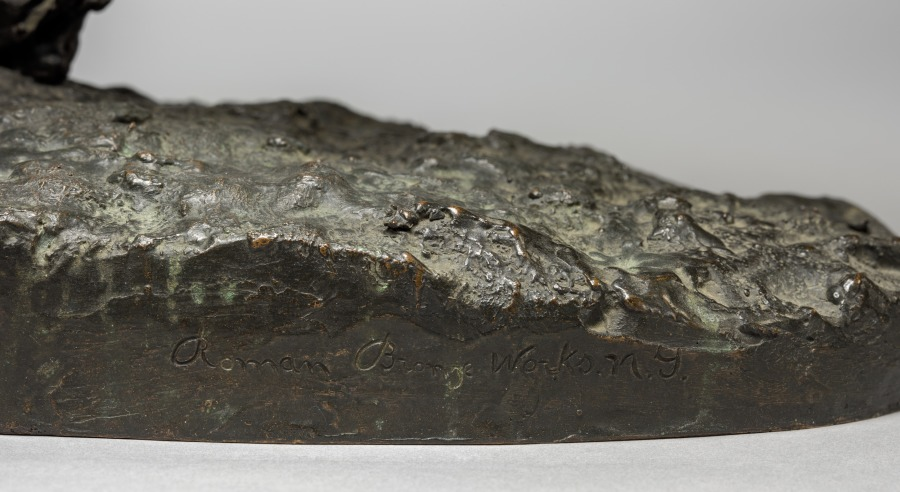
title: Trooper of the Plains-1868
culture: America, early 20th Century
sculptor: Frederic Remington (American, 1861–1909)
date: modeled 1908, cast c. 1911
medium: bronze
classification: Sculpture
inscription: Signed on top of base: Frederic Remington; Inscribed on side of base: Copyright by Frederick Remington, Roman Bronze Works, N.Y.; numbered underneath base: 3